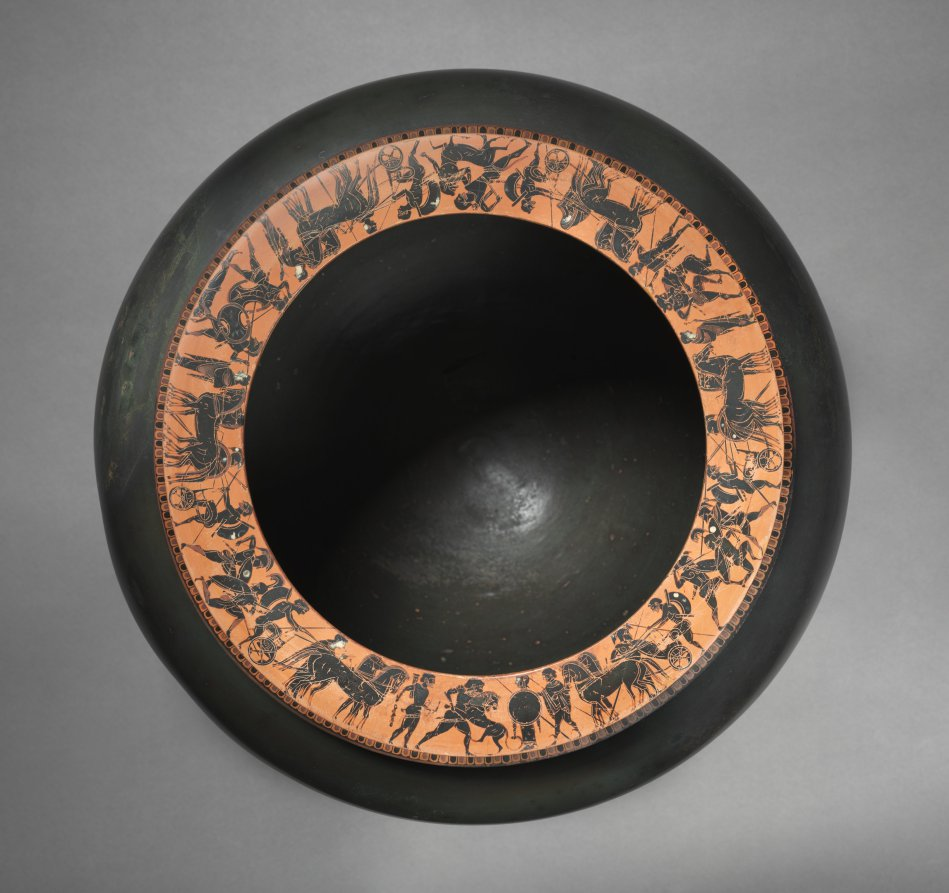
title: Black-Figure Dinos (Mixing Vessel): Warships (Int.); Heroic Scenes (Top)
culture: Greek, Attic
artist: circle of Antimenes Painter (Greek, Attic, active c. 530–510 BCE)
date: c. 520–515 BCE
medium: ceramic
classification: Ceramic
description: Designed for use at a symposium, or drinking party, this large dinos has a wide mouth allowing easy access to its contents—wine mixed with water (and sometimes other ingredients for flavoring). While drinking, symposiasts would often recite poetry and celebrate the mythological exploits of gods and heroes, perhaps prompted by the images painted on their pottery. Here, the vase-painter clearly anticipated such use; when the vessel was full, the ships painted on the inside of the rim would appear to sail across the “wine-dark sea” (to borrow a phrase found frequently in Homer’s Iliad and Odyssey). Other heroic scenes, including Herakles wrestling the Nemean lion and Theseus battling the Minotaur, appear on top of the rim, interspersed with chariots and anonymous combats.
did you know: Unable to stand on its own, this round-bottomed vessel probably once had a separately made base.